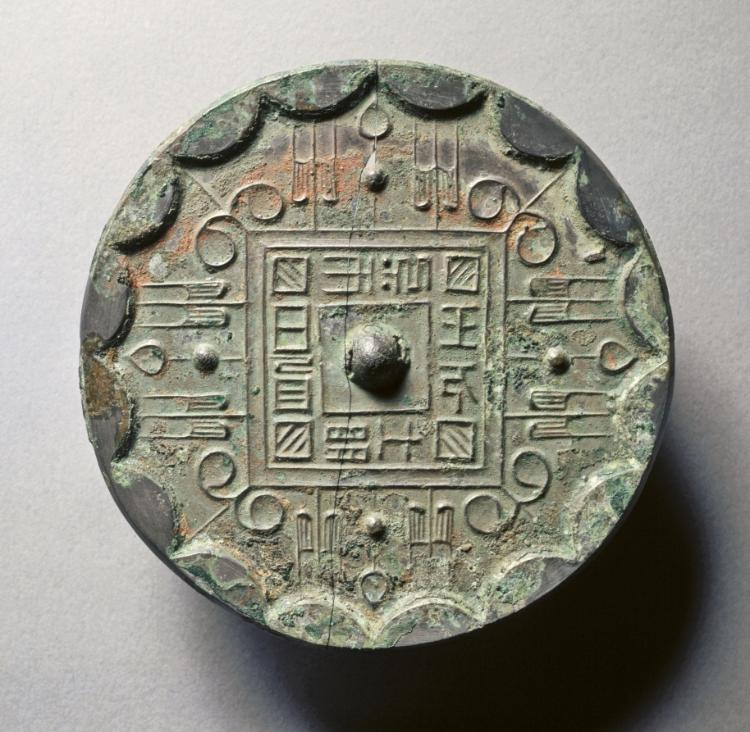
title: Mirror with a Square Band, Four Nipples, and Grass Leaf Motifs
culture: China, Western Han dynasty (206 BCE–8 CE)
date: late 300s BCE–50 CE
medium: bronze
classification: Metalwork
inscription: By the light of the sun, the world is made bright.